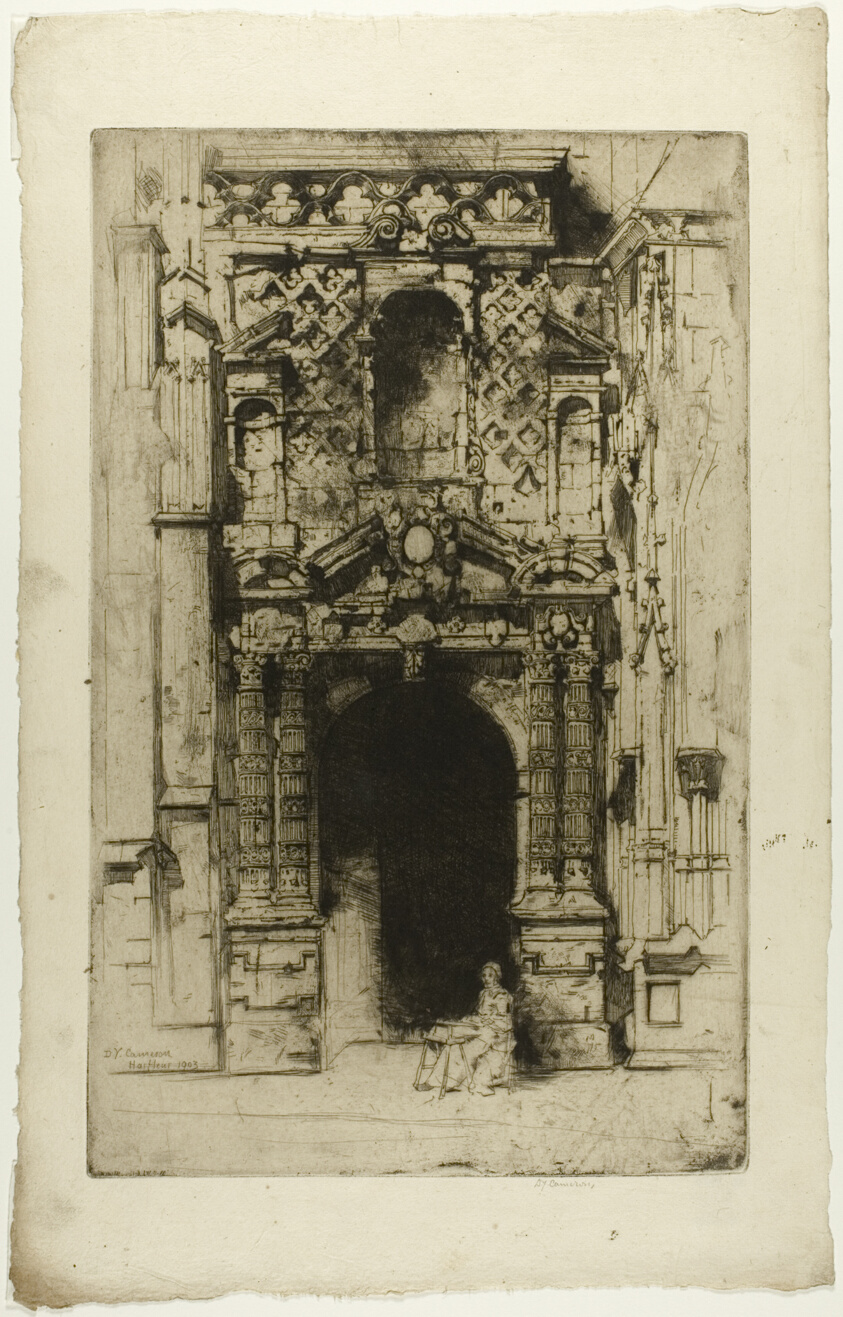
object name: Print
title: Harfleur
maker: David Young Cameron (Scottish, 1865-1945)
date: 1903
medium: Etching and drypoint on cream laid paper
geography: Scotland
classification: etching; print; prints and drawing